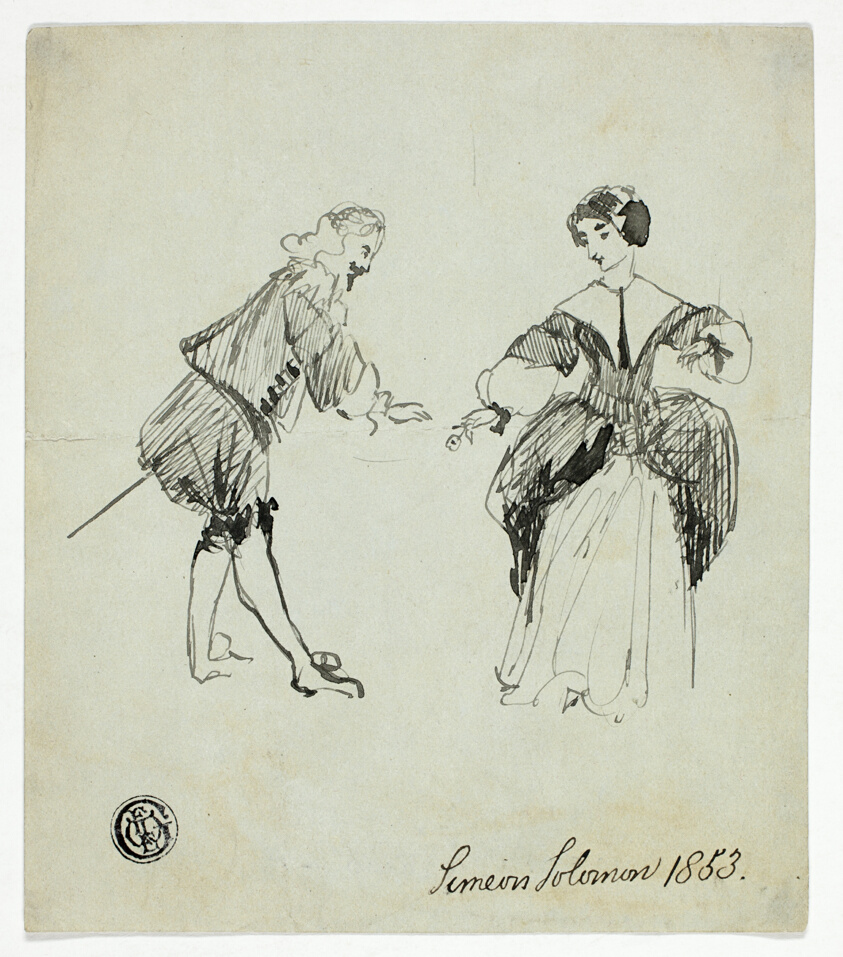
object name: Drawing and Watercolor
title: Cavalier and Lady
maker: Simeon Solomon (English, 1840-1905)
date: 1853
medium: Pen and black ink on pale gray wove paper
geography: England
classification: pen and ink drawings; drawings (visual works); prints and drawing